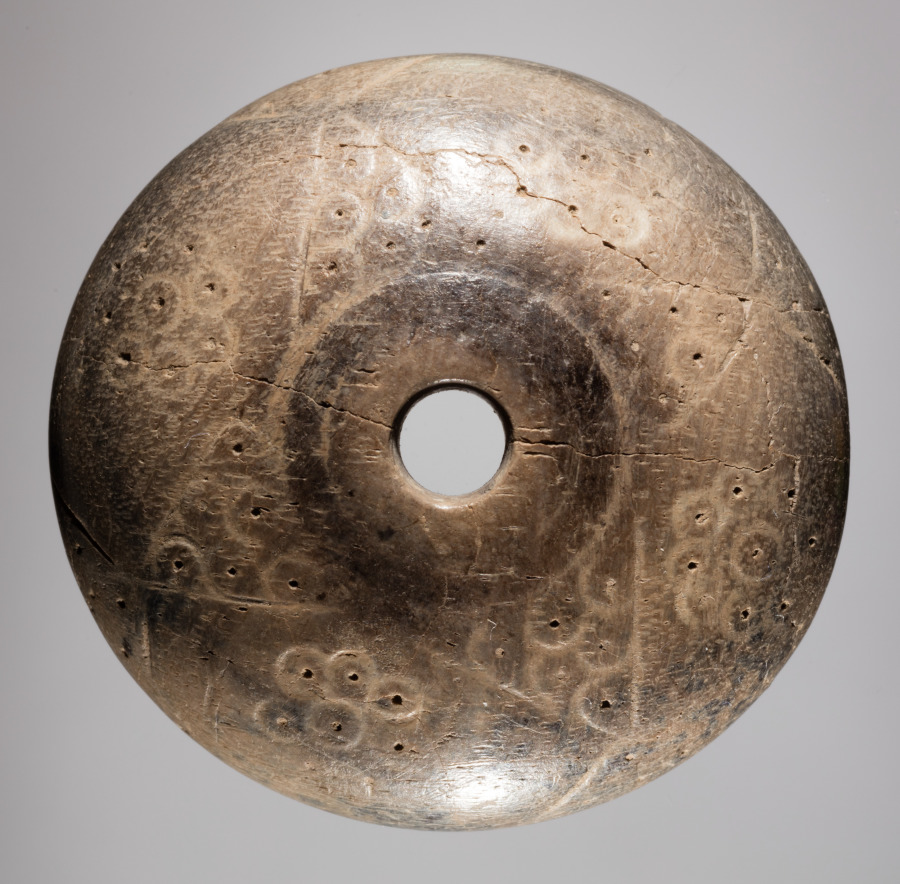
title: Spindle Whorl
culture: Iran, early Islamic period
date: 700s - 900s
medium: bone, incised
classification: Spindle Whorl